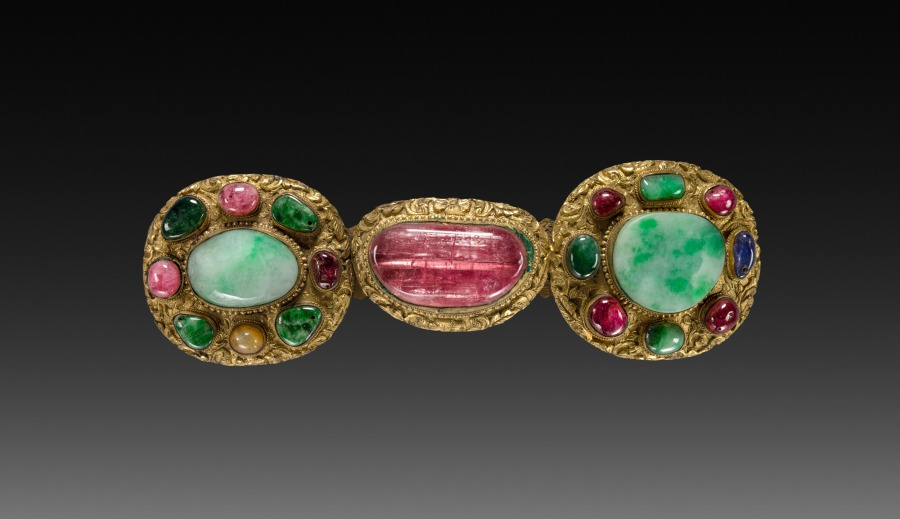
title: Buckle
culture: China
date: 1900s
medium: Brass, gilt and engraved and set with jade, kunzite, and ruby or spinel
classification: Jewelry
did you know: The pink gemstone kunzite may be sourced from Afghanistan, Pakistan, or Brazil.